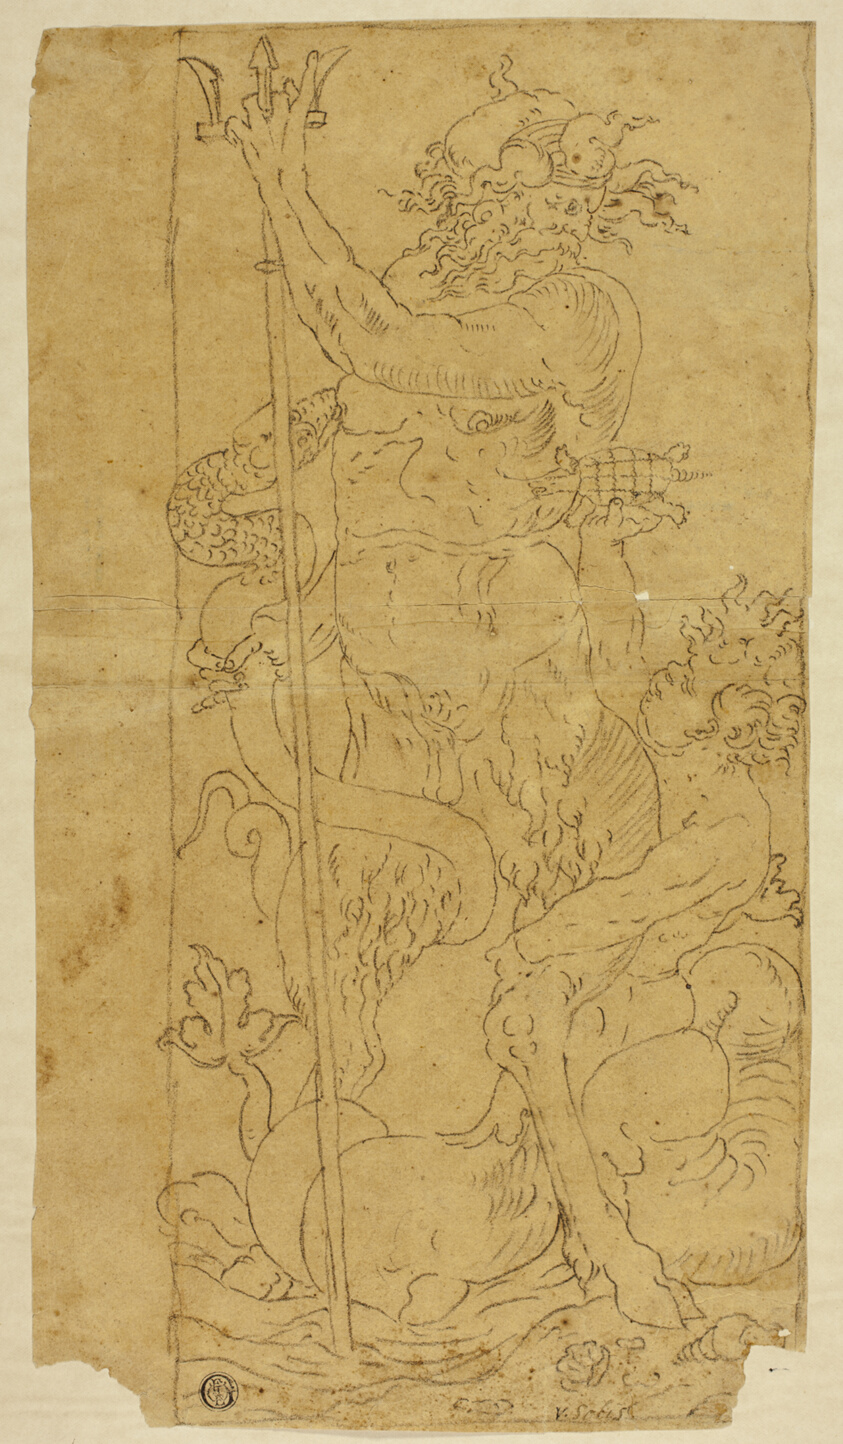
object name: Drawing and Watercolor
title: Neptune and Triton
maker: Unknown Artist (German, late 16th century)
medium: Black crayon on tan laid paper, tipped onto buff wood-pulp laminate board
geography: Germany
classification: crayon; drawings (visual works); prints and drawing